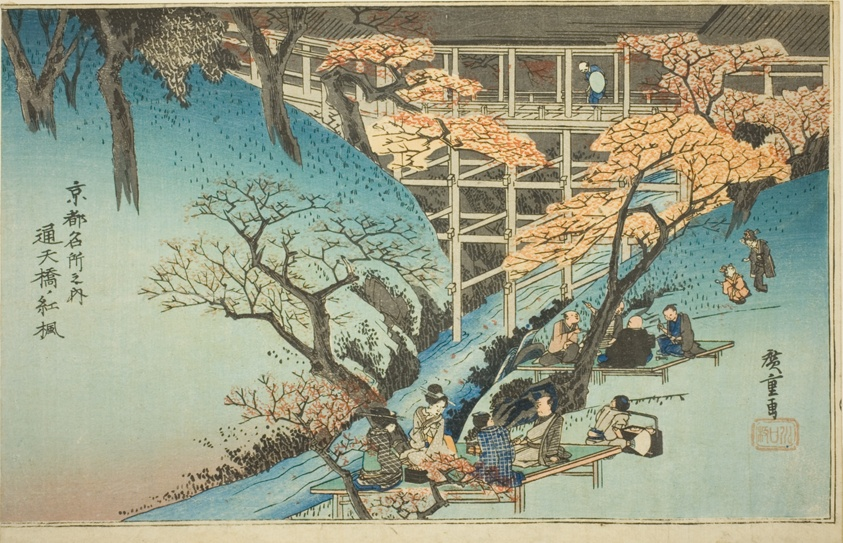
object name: Print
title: Red Maple Trees at the Tsuten Bridge (Tsutenkyo no momiji), from the series "Famous Places in Kyoto (Kyoto meisho no uchi)"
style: Japanese (culture or style)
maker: Utagawa Hiroshige 歌川 広重; Japanese, 1797-1858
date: c. 1834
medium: Color woodblock print; oban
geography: Japan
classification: woodblock print; print; asian art